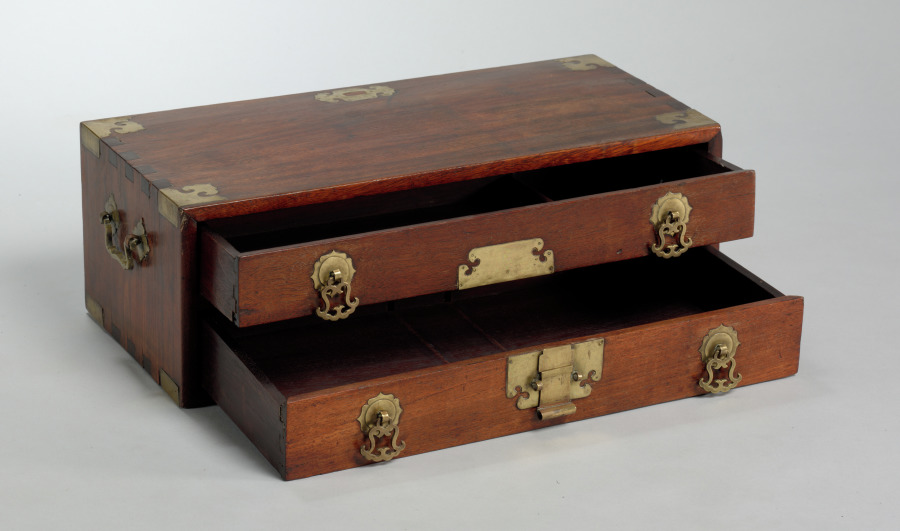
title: Small Oblong Two-Drawer Chest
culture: China, Qing dynasty (1644-1911)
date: 1800s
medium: Chicken-wing wood (jichimu)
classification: Furniture and woodwork